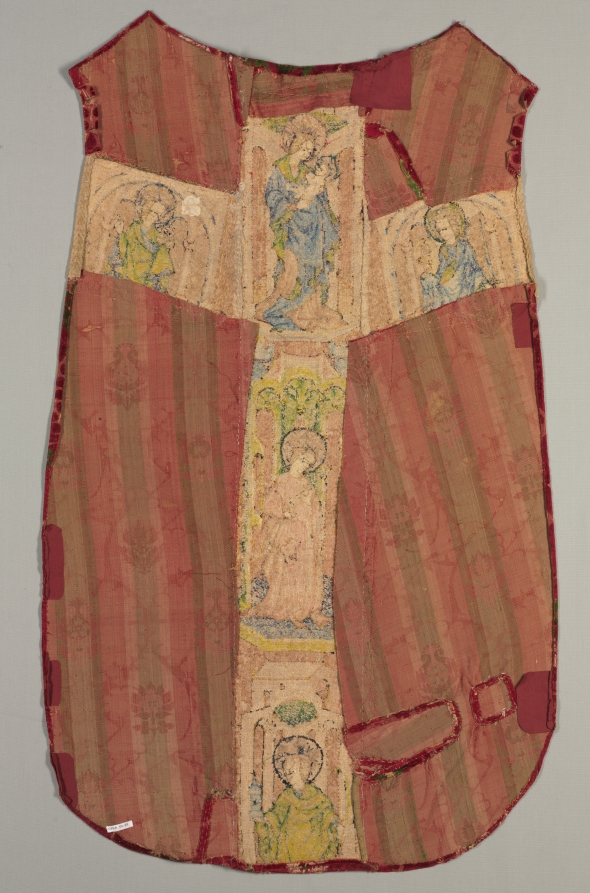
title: Chasuble Back with Embroidered Orphrey Band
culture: Italy (chasuble ground); Austria, Graz (orphrey)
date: 1415–25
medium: Velvet: cut pile and voided; silk, gold and silver thread: embroidery; split and couching stitches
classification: Embroidery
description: The chasuble is the main sleeveless outer vestment worn by priests while officiating during Mass. By the 1400s, the chasuble became highly ornamented with embroidered decorative bands called orphreys, often in the shape of a cross, as seen here. This luxurious Italian example features velvet of three colors with lush pile. In Graz, Austria, it was embellished with a locally embroidered orphrey featuring crowns, haloes, and backgrounds of scenes formed with gold thread. The Virgin and Child, and Saints Catherine, Dorothy, Ursula, and Barbara are featured.